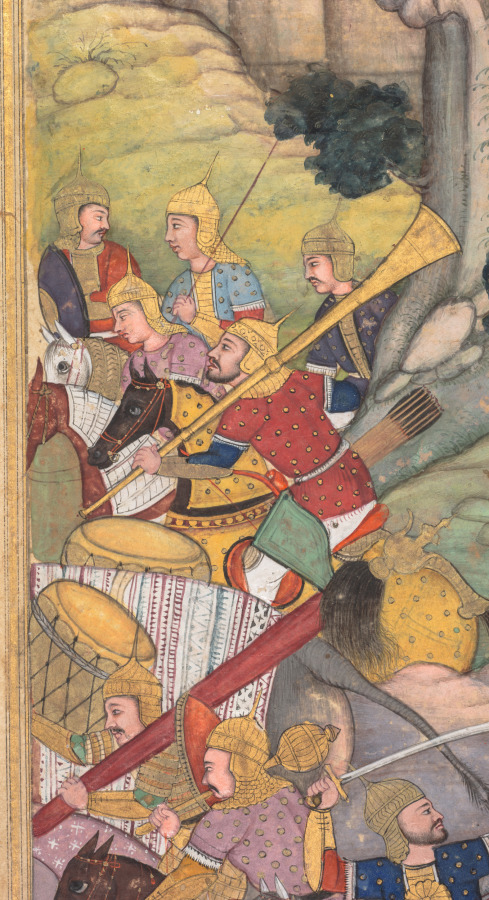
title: Mughal ruler Humayun defeating the Afghans before reconquering India, folio from an Akbar-nama (Book of Akbar) of Abu’l Fazl (Indian, 1551–1602)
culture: Mughal India, court of Akbar (reigned 1556–1605)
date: c. 1590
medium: Gum tempera, ink, and gold on paper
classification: Painting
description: In a battle that took place in 1555, the second Mughal emperor, Humayun, reconquered northern India from the Afghans with the help of Iranian military forces. His mounted figure stands out from the fray, with his golden helmet and red tunic silhouetted against a hillside in the upper center of the composition. To illustrate the beginning of hisown biography, Humayun’s son Akbar included this image of his father riding victoriously back to India. The scene never actually occurred in this way, since Humayun did not participate in this particular battle; his inclusion here is symbolic.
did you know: A well-trained war elephant can pull an opponent off his horse with its trunk.